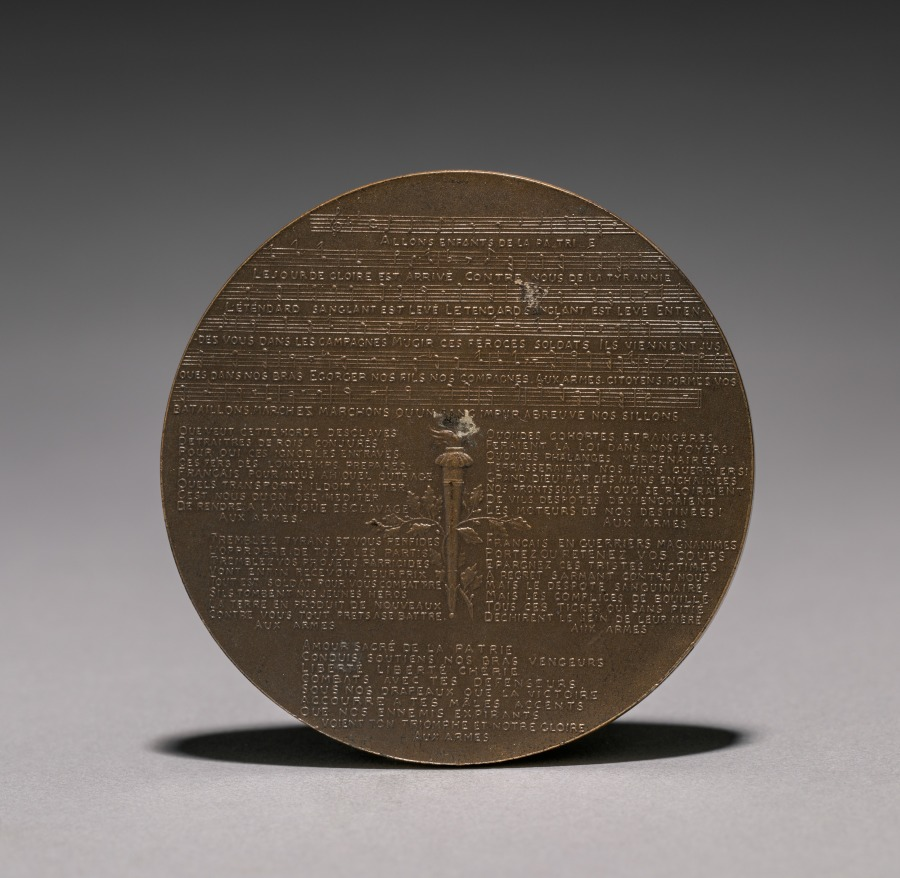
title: Medal of Claude Joseph Rouget de L'Isle (1760-1836) (reverse)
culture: France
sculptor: Alfred Borrel (French, 1836–1927)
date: 1911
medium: bronze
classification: Metalwork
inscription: Reverse: [score and all verses of "La Marseillaises"]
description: The French sculptor and medalist Alfred Borrel (1836-1927) created this portrait medal to commemorate the 75th anniversary of Rouget de L'Isle's death in 1836, the same year in which the sculptor was born.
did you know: Claude Joseph Rouget de L'Isle composed the French national anthem, La Marseillaises, in 1792 in Strasbourg after France had declared war on Austria.